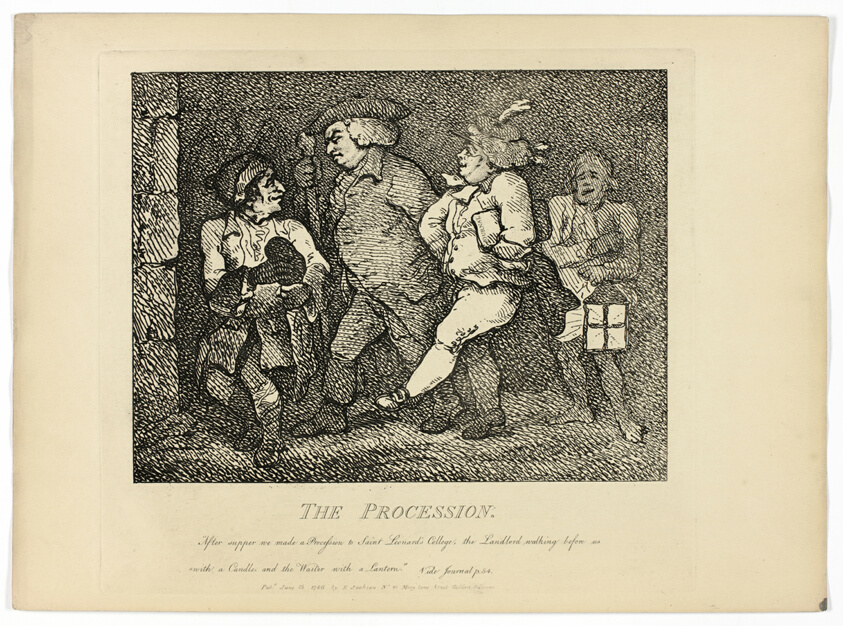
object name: Print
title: The Procession, from Boswell's Tour of the Hebrides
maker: Thomas Rowlandson (English, 1756-1827)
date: 1786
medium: Etching on paper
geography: England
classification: etching; print; prints and drawing